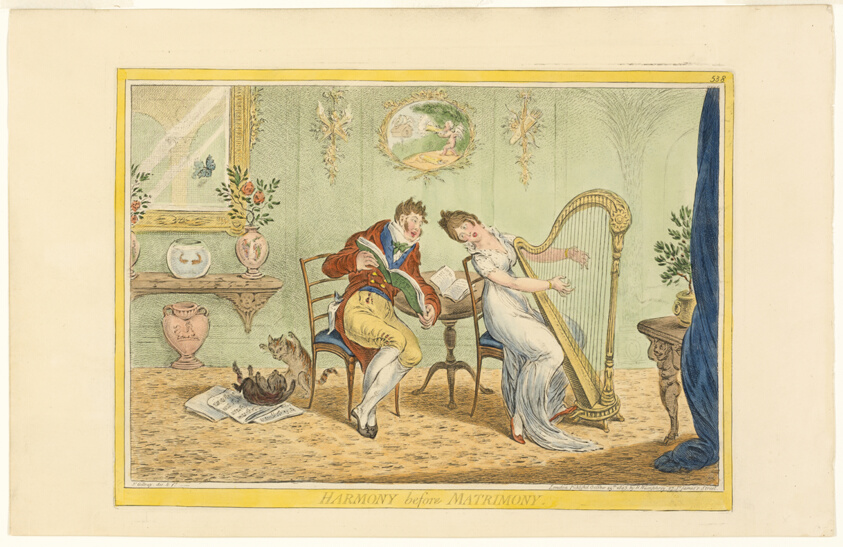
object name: Print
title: Harmony Before Matrimony (recto); Clearing the Five Bar Gate (verso)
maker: James Gillray (English, 1756-1815); published by Hannah Humphrey (English, c. 1745-1818)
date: published October 25, 1805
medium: Hand-colored etching on paper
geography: England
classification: etching; print; prints and drawing